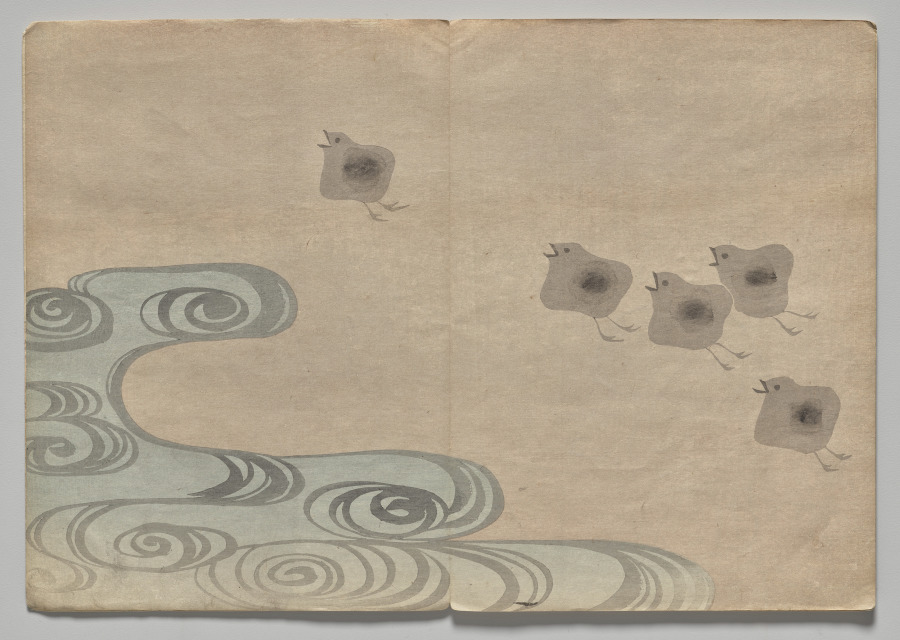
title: Scene from The Kōrin Picture Book (Volume 1)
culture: Japan, Edo period (1615–1868)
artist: Nakamura Hōchū (Japanese, d. 1819)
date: 1800s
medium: color woodblock printed book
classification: Bound Volume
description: Ogata Korin (1658-1716) was one of the most admired artists of Rimpa, or "decorative school painting." These books by the charming later-generation Rimpa artist Hochu record Korin's inventive designs.